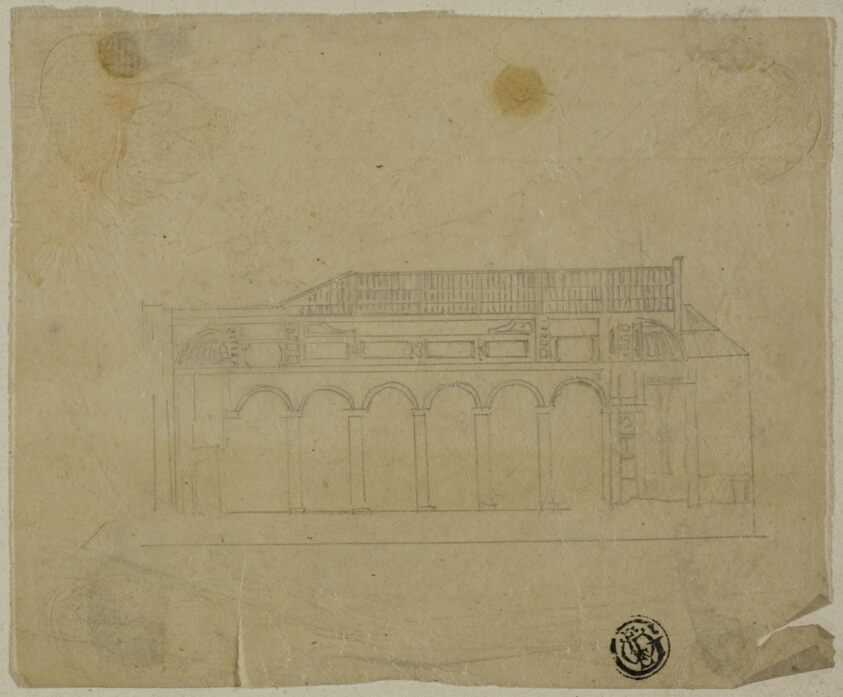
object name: Drawing and Watercolor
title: Cross-Section of Basilica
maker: Unknown Artist; European, n.d.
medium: Graphite, on tan tracing paper, tipped on cream wove paper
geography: Europe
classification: graphite; drawings (visual works); prints and drawing